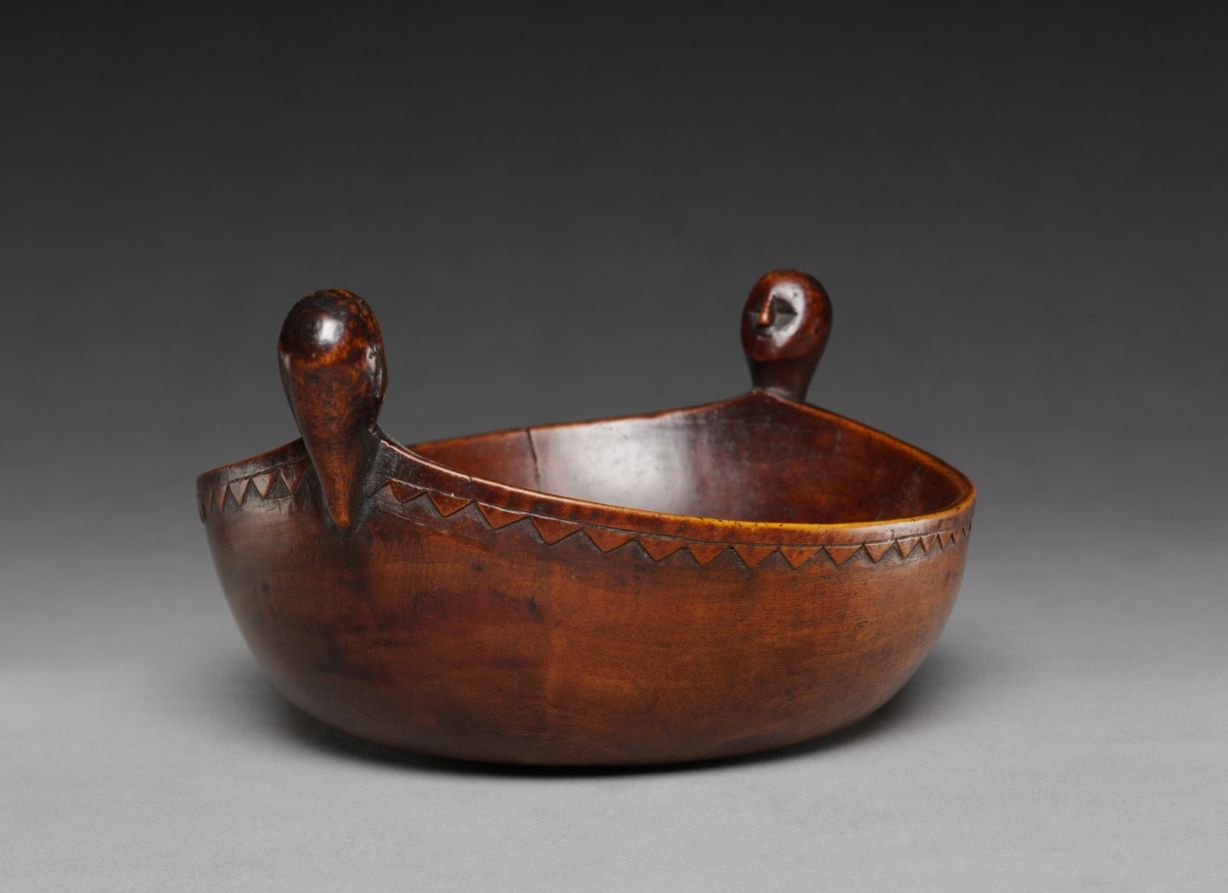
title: Bowl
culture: Native North America, Northeastern Woodlands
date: early 1800s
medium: wood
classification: Wood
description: Fine wooden bowls were often used during feasts in the Northeastern Woodlands. The heads on the rims may represent spirit beings, perhaps the owner’s guardian spirits, acquired through dreams or visions—thought to be the ultimate sources of truth. The medium may also be profoundly meaningful. A Great Lakes (Meskwaki) Native said in 1911, “The murmur of the trees when the wind passes through is but the voices of our grandparents. Often a whole forest hums with talk . . . we often hear the sound of their laughter and the sound of their lamentations.”